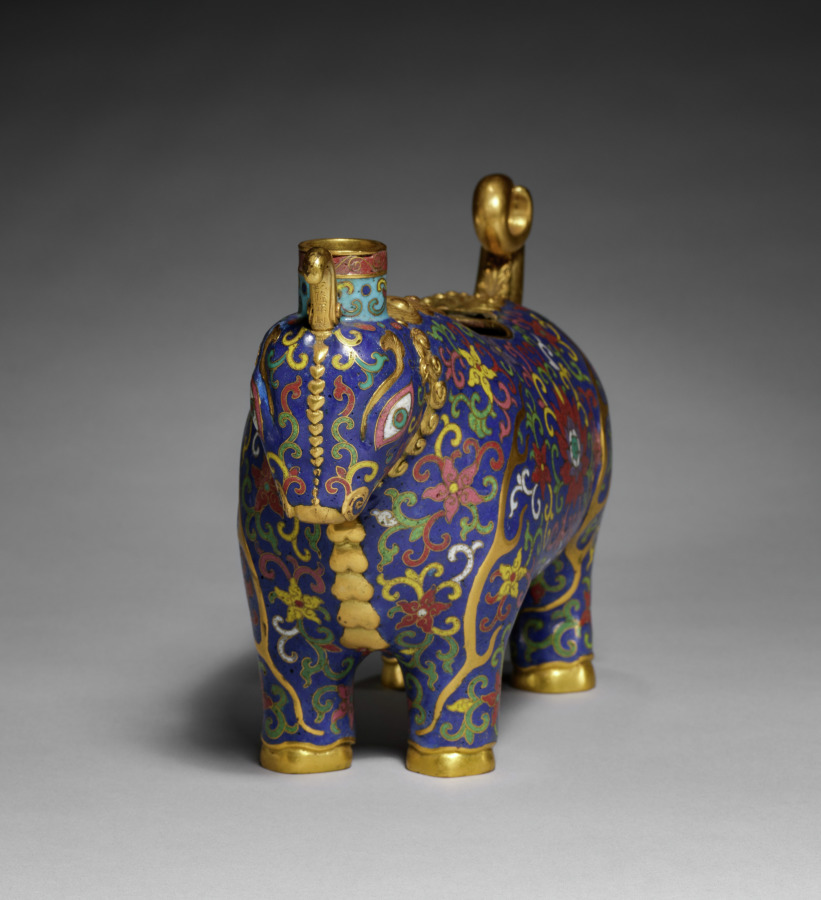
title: Container in the Form of a Unicorn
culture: China, Qing dynasty (1644-1911), Qianlong mark and reign (1736-95)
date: 1736–95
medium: cloisonné enamel and gilt copper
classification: Enamel